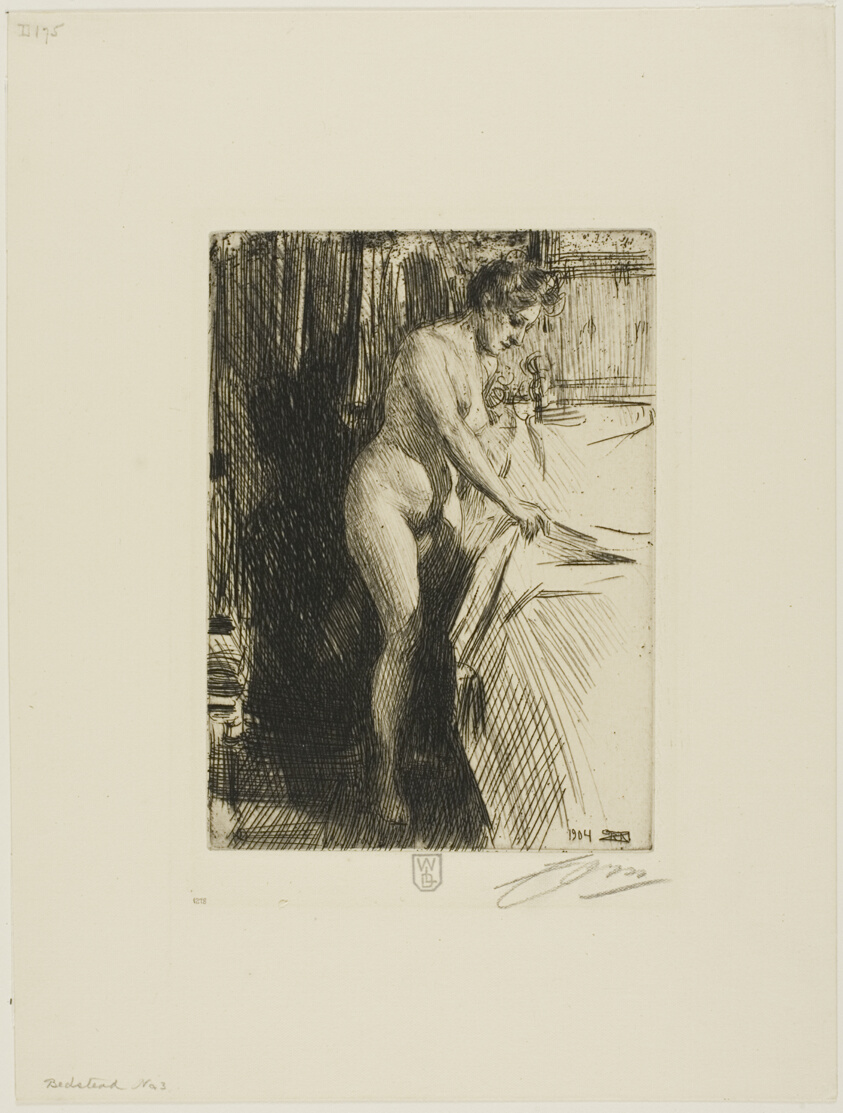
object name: Print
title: Olandine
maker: Anders Zorn (Swedish, 1860-1920)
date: 1904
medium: Etching on ivory laid paper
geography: Sweden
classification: etching; print; prints and drawing